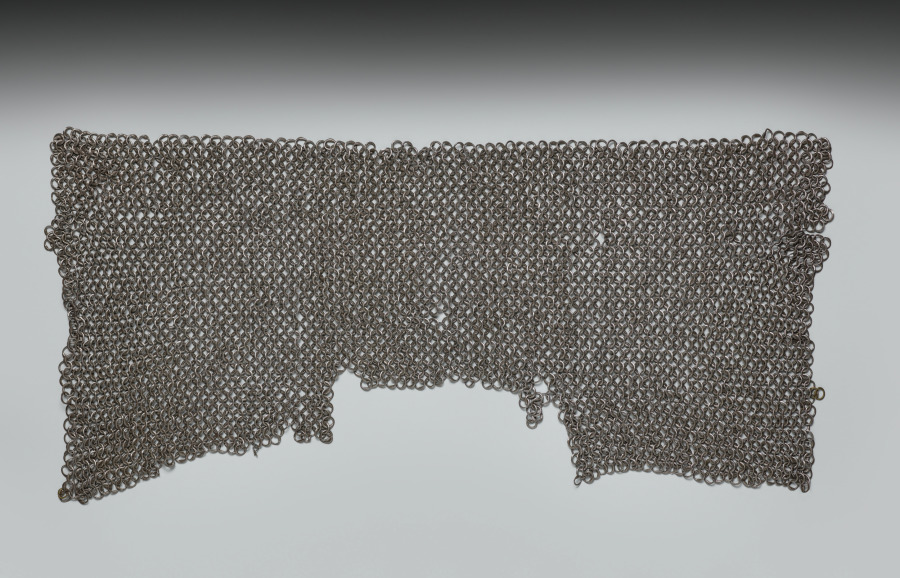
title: Chain Mail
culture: Europe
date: 1500s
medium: steel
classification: Arms and Armor